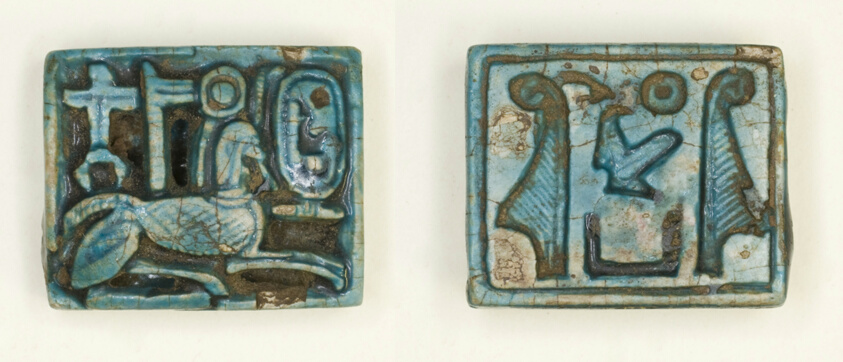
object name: Decorative Arts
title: Plaque: Sphinx with Cartouche/Maatkare Flanked by Feathers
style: new kingdom, egyptian, ancient, eighteenth dynasty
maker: Egyptian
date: New Kingdom, Dynasty 18, reign of Hatshepsut (about 1473–1458 BCE)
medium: Glazed steatite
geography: Egypt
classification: amulet; ancient art; decorative arts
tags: sphinxes, feathers, Hieroglyphs, pharaohs